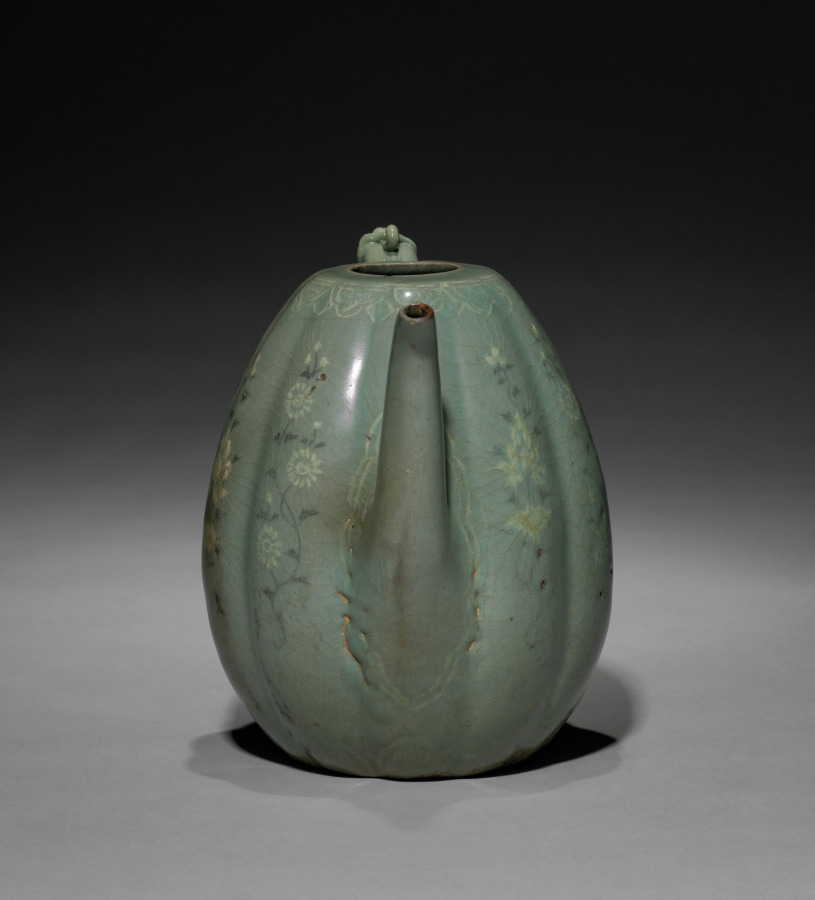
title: Melon-shaped Ewer with Incised Peony Design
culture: Korea, Goryeo dynasty (918–1392)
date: 918–1392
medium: pottery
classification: Ceramic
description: This melon-shaped pitcher is adorned with a delicate drawing that renders chrysanthemum buds with full blossoms in white and black inlays. In Korea, chrysanthemum flowers and leaves were made into both tea and wine. Chrysanthemum wine was enjoyed during the the Double Nine Festival (the ninth day of the ninth month in the lunar calendar) when praying for longevity.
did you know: The shape of this pitcher resembles a type of yellow muskmelon cultivated mainly in East Asia.